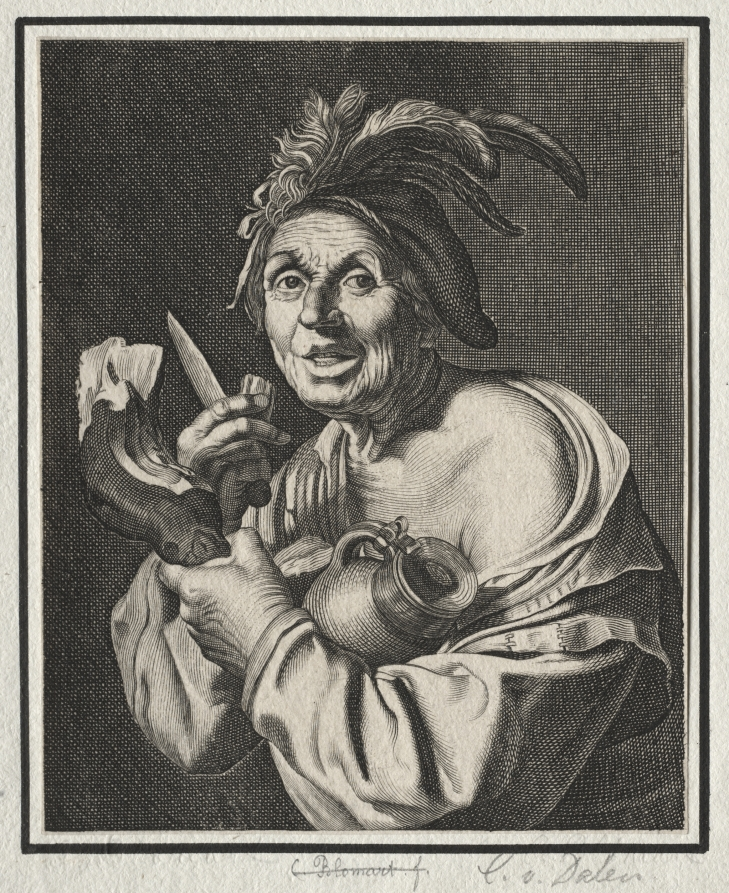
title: A Man with a Ham, Just Cut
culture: Netherlands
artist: Cornelis van Dalen (Dutch, 1638-c. 1664)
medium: engraving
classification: Print